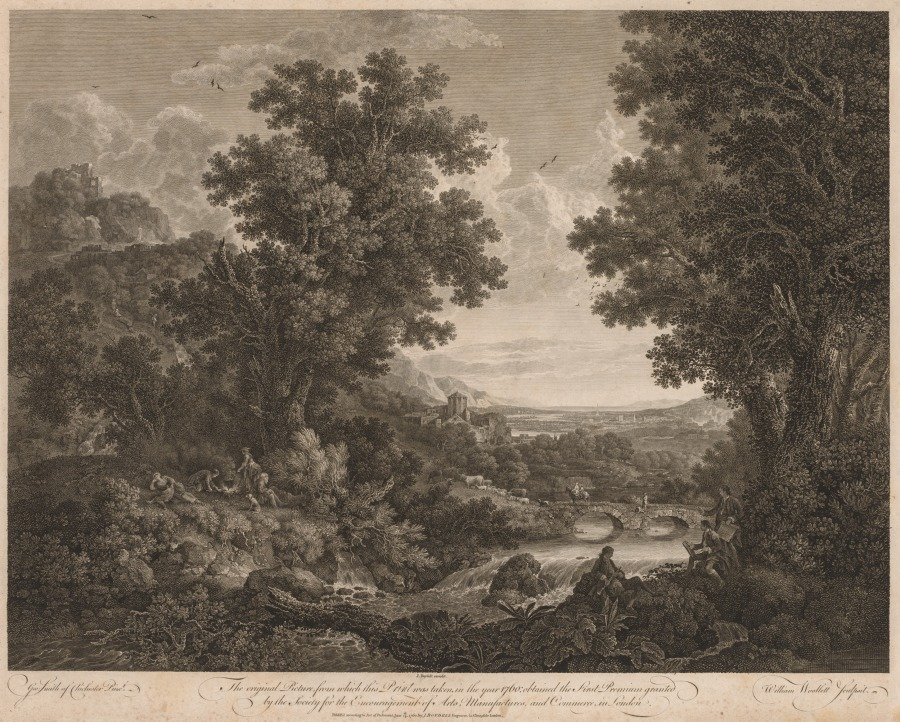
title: Landscape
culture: England, 18th century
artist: William Woollett (British, 1735–1785)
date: 1763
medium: engraving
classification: Print